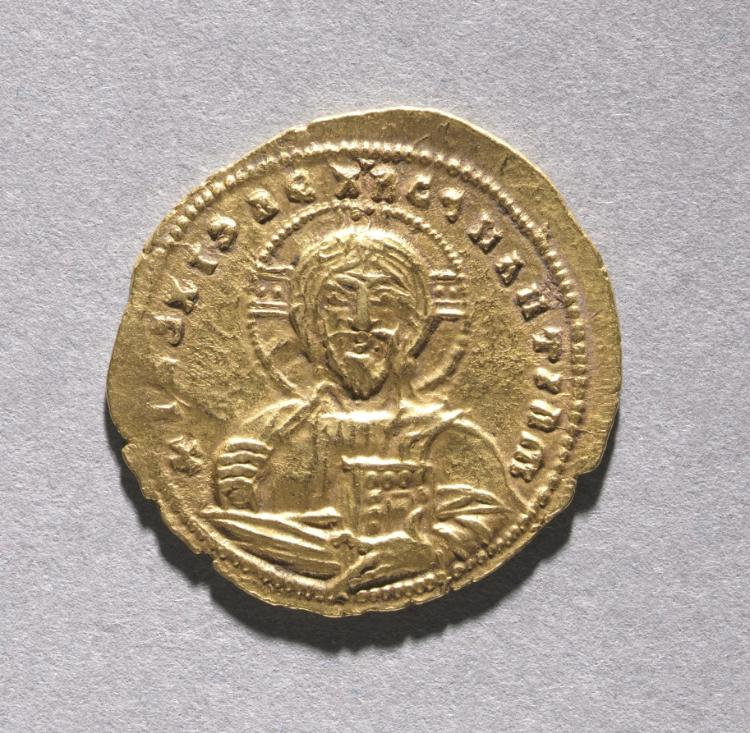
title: Nomisma with John I Zimisces (obverse)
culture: Byzantium, Constantinople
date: 969–976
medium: gold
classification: Coins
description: The vast number of surviving Byzantine coins attests to the level of trade across the empire. Controlled and supervised by the emperor, the producers of coins took care to represent his authority and reflect his stature. Talented artists were recruited to engrave the dies (molds) used for the striking of coins. Emperors increasingly came to include their heirs and co-emperors on their coinage, as well as other family members or even earlier rulers. Coins were recognized, then as now, as small, portable works of art. With their inscriptions and images, Byzantine coins provide valuable documentation of historical events and a record of the physical appearance of the emperors. The coins shown here include the solidus, the basic gold coin of 24 karats; the tremissis, a gold coin of one-third the weight and value of the solidus; and the nomisma, which in the 10th century replaced the solidus as the standard gold coin.